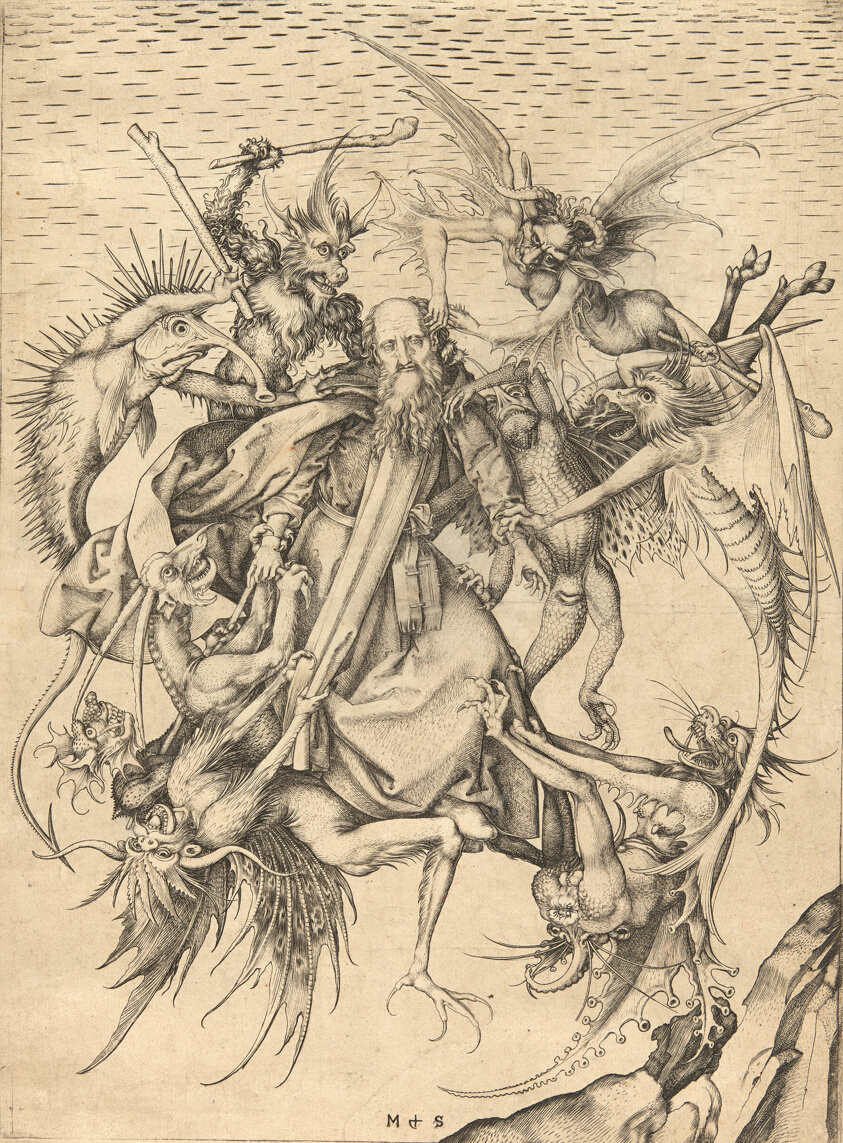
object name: Print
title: The Temptation of Saint Anthony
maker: Martin Schongauer (German, c. 1430/50-1491)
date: 1470–75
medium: Engraving in black on cream laid paper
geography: Germany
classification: engraving; print; prints and drawing